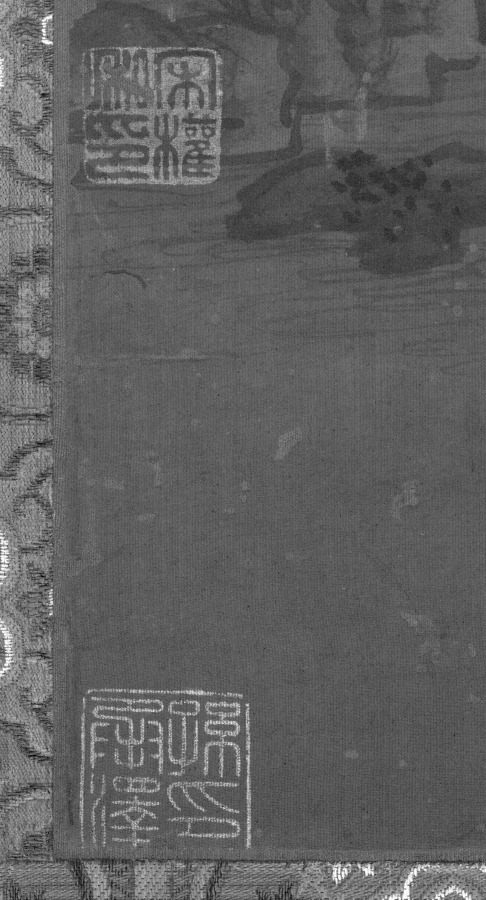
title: Landscape in the Style of Juran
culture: China, Ming dynasty (1368–1644)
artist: attributed to Liu Du (Chinese, active c. 1628-after 1653)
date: 1368–1644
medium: Hanging scroll mounted as a panel; ink and slight color on silk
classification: Painting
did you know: There is a tiny apocryphal signature under the overhanging rocks on the lower left side.